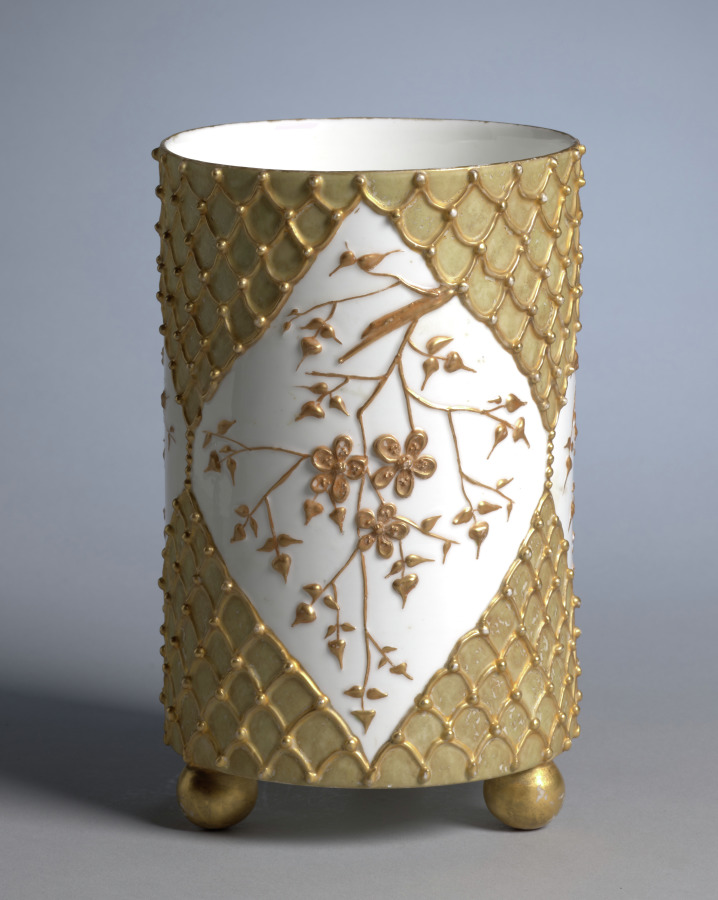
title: Vase (Lotus Ware)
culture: America, Ohio, East Liverpool, 19th century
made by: Knowles, Taylor and Knowles Company (American)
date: c. 1895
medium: porcelain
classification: Ceramic